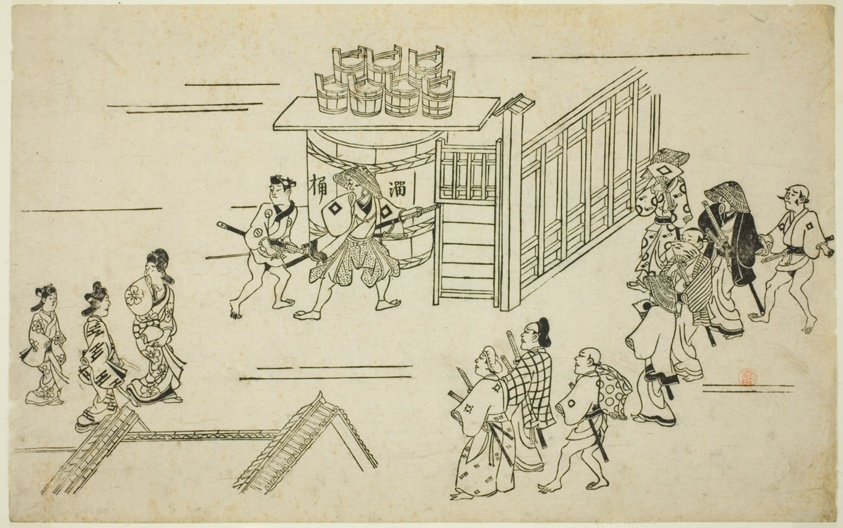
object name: Print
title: Scene in the Yoshiwara, from the series "Views of Yoshiwara"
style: Japanese (culture or style)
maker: Hishikawa Moronobu (Japanese, about 1618-1695)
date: About 1680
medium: Woodblock print; sumizuri-e, oban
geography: Japan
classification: woodblock print; print; asian art; woodblock